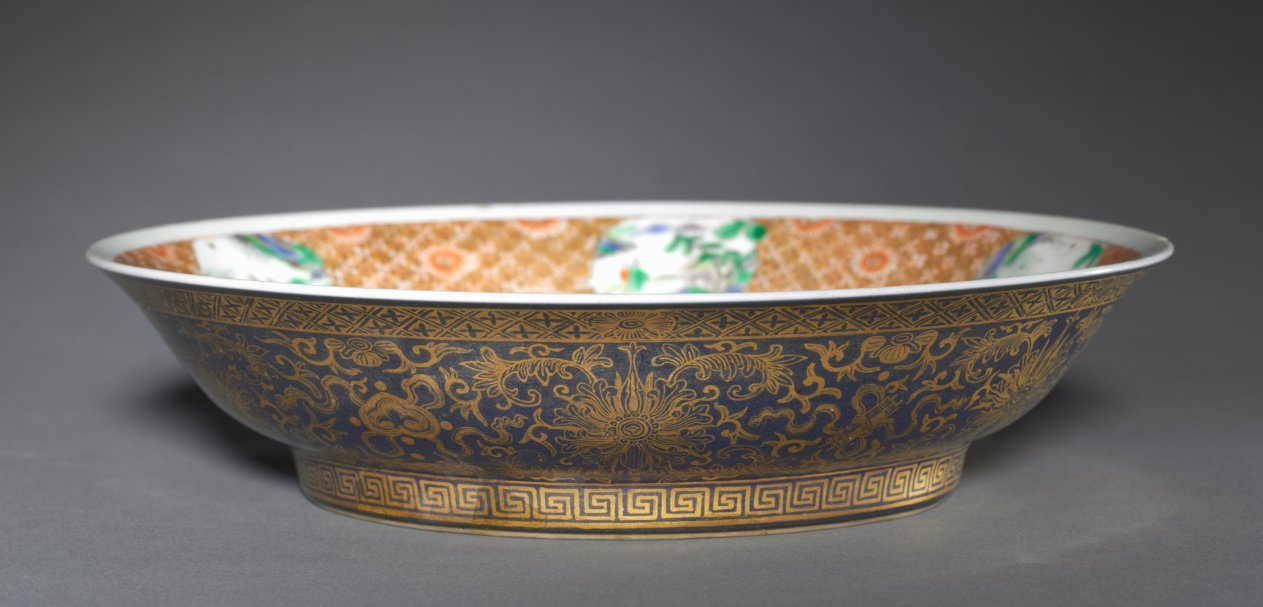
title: Dish with Zhang Guolao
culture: China, Jiangxi province, Jingdezhen kilns, Qing dynasty (1644-1911), Kangxi reign (1662-1722)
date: 1662–1722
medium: porcelain with famille verte overglaze enamel and painted gold decoration (interior) and powder blue glaze with painted decoration (exterior)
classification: Ceramic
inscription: 大清康熙年製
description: Zhang Guolao, featured on this dish, is one of the Eight Immortals and a gifted magician who was believed to know the secret arts to obtain longevity. Typically depicted as an old man and accompanied by his mule, he is the patron saint of artists. His mule is said to be magical; it can be folded up like a piece of paper to fit into a small bag. The central scene is framed by a sumptuously gold-decorated rim showing spaces reserved for landscape scenes in primarily fresh blue and green colors.